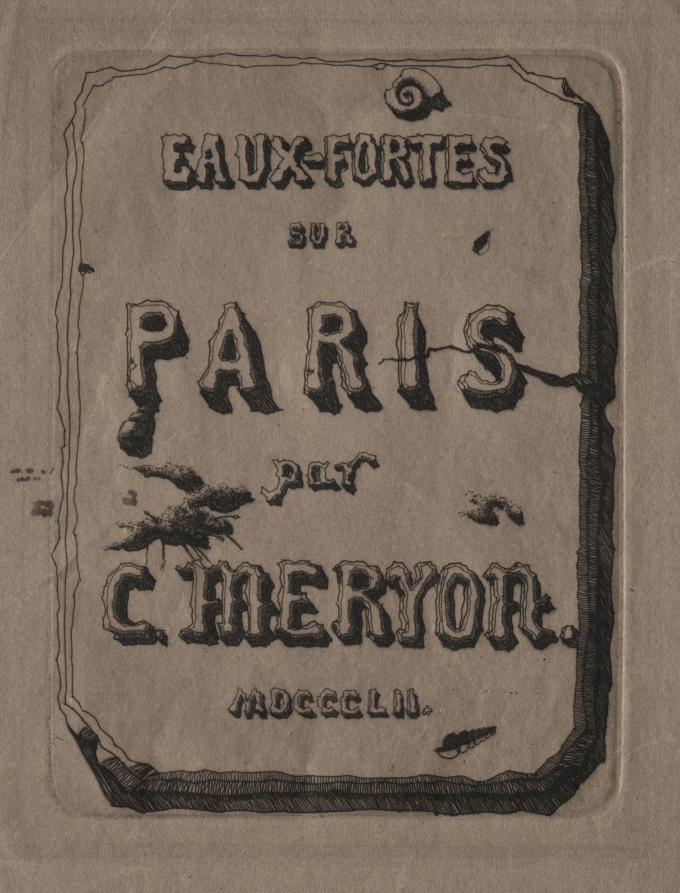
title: Etchings of Paris: Title Page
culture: France, 19th century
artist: Charles Meryon (French, 1821–1868)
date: 1852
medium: etching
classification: Print